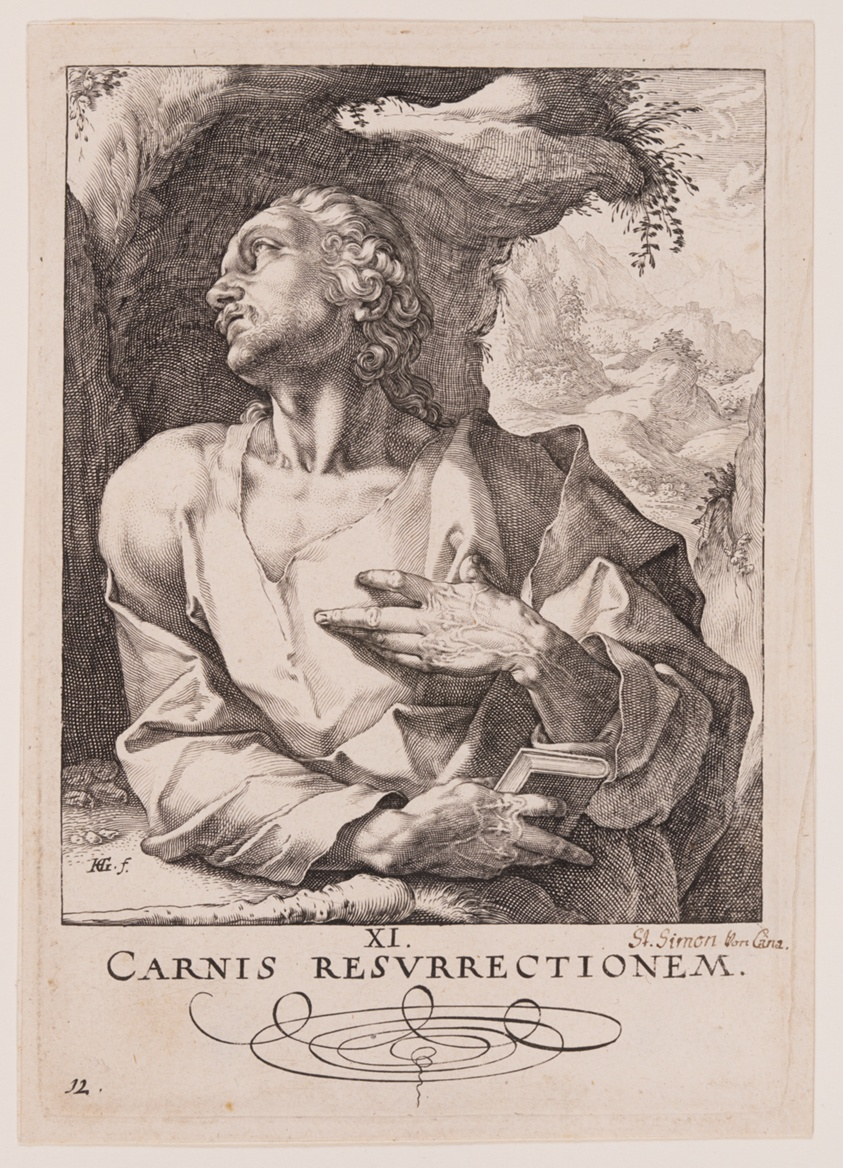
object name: Print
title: St Jude Thaddeus, from Christ, the Apostles and St Paul with the Creed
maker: Hendrick Goltzius (Dutch, 1558–1617)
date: 1589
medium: Engraving on ivory laid paper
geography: Netherlands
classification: engraving; paper; print; prints and drawing